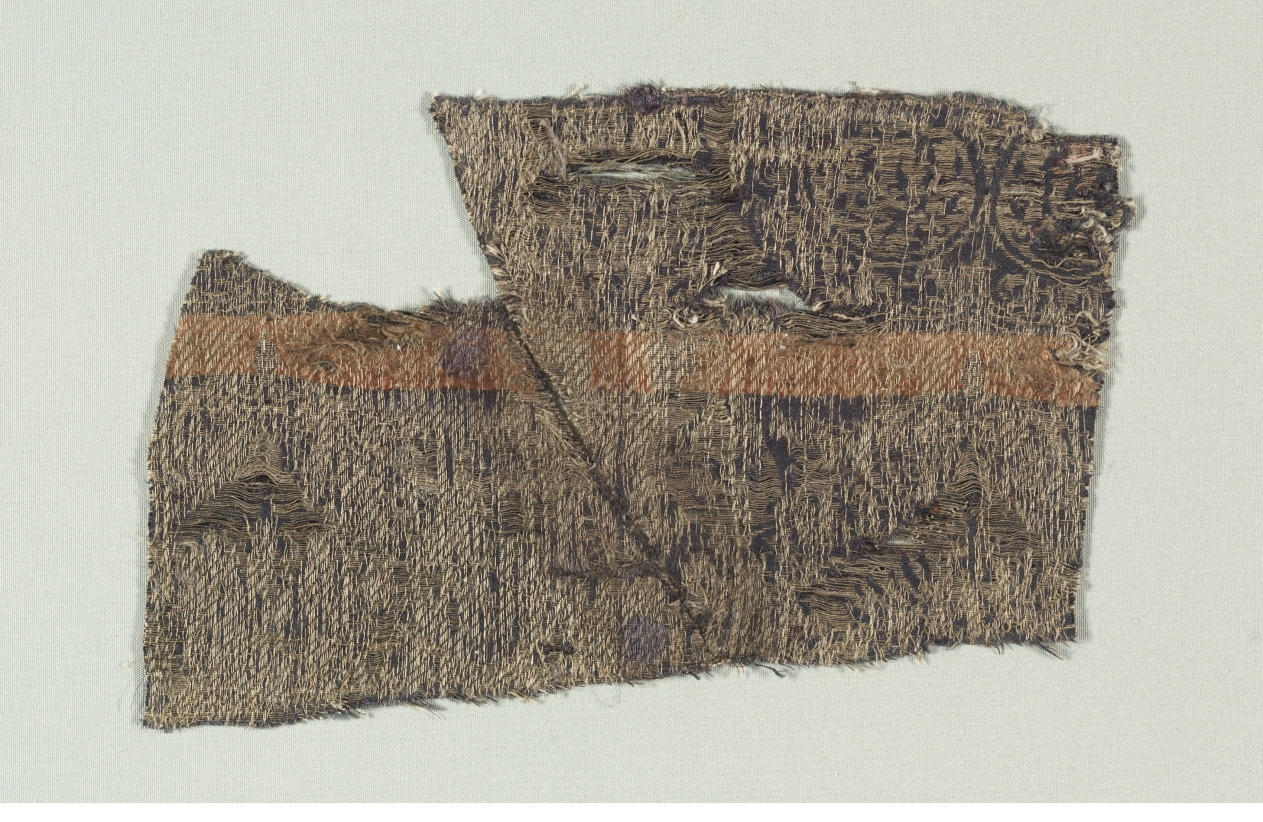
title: Silk with Dogs and Arabic Script in Swaying Bands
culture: Italy, last third of 14th century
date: 1370–1400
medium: silk and silver thread; a combination of two weaves, 2/1 twill and 1/5 twill (lampas)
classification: Textile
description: Arabic script was included in many Italian silk patterns during the 1300s and early 1400s. Usually a few unintelligible but decorative Arabic letters were repeated in the design, but here, the pseudo-Arabic script is prominently displayed in the scalloped bands that support trefoil palmettes. Dogs and birds are incorporated into the pattern in an Italian fashion. During the 1300s and 1400s, Arabic script was featured in luxurious silks woven in Islamic territories, where it symbolized royal power. Spain, Egypt, and to a lesser extent the former Islamic territory of Sicily all produced examples that could have influenced the international silk style created by Italian silk designers. In addition, weavers may also have reinforced the fashion; they migrated from Sicily to the silk-weaving city of Lucca and subsequently to Venice. In Italian painting, pseudo-Arabic script not only decorated the border of the Virgin's mantle, but it was also repeated in silks displayed in the backgrounds.